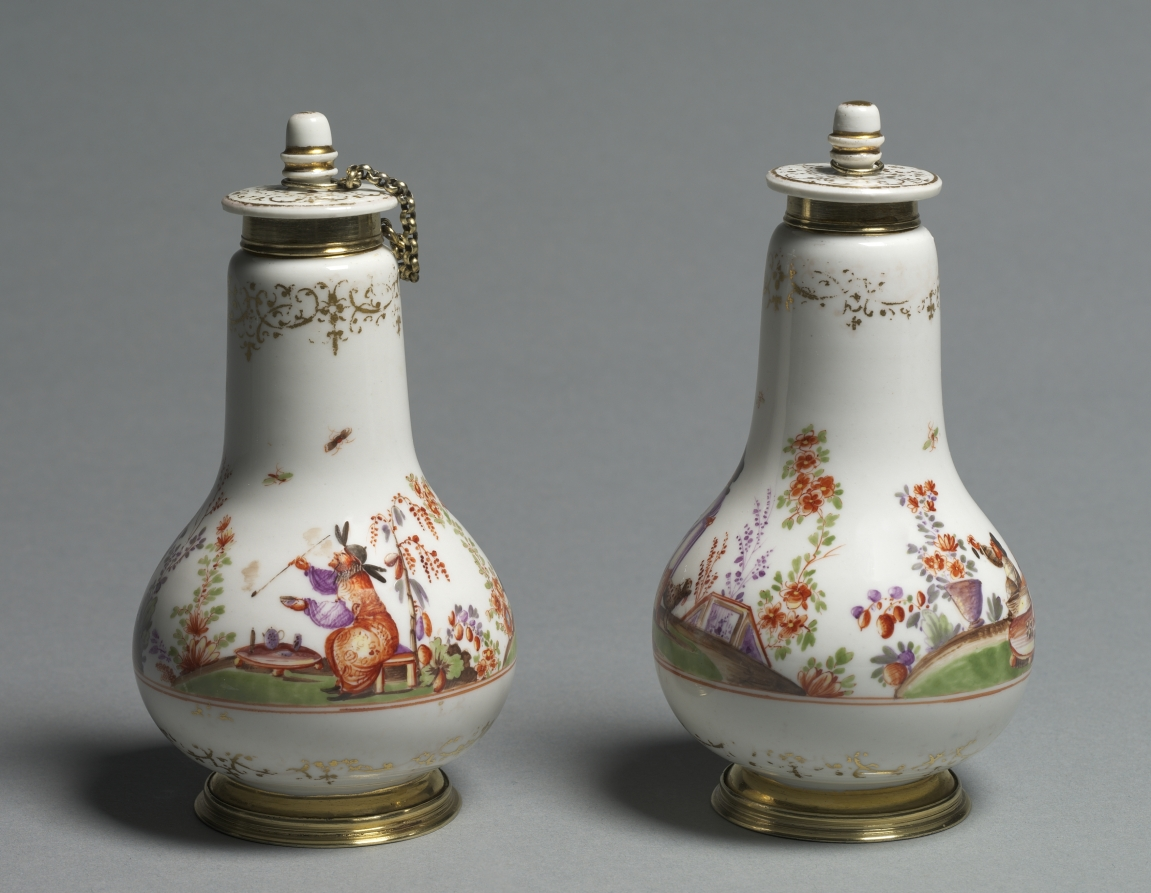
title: Covered Flasks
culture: Germany, Meissen, 18th century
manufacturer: Meissen Porcelain Factory (German, est. c. 1710)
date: c. 1720–1723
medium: porcelain with gilt metal mounts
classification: Ceramic